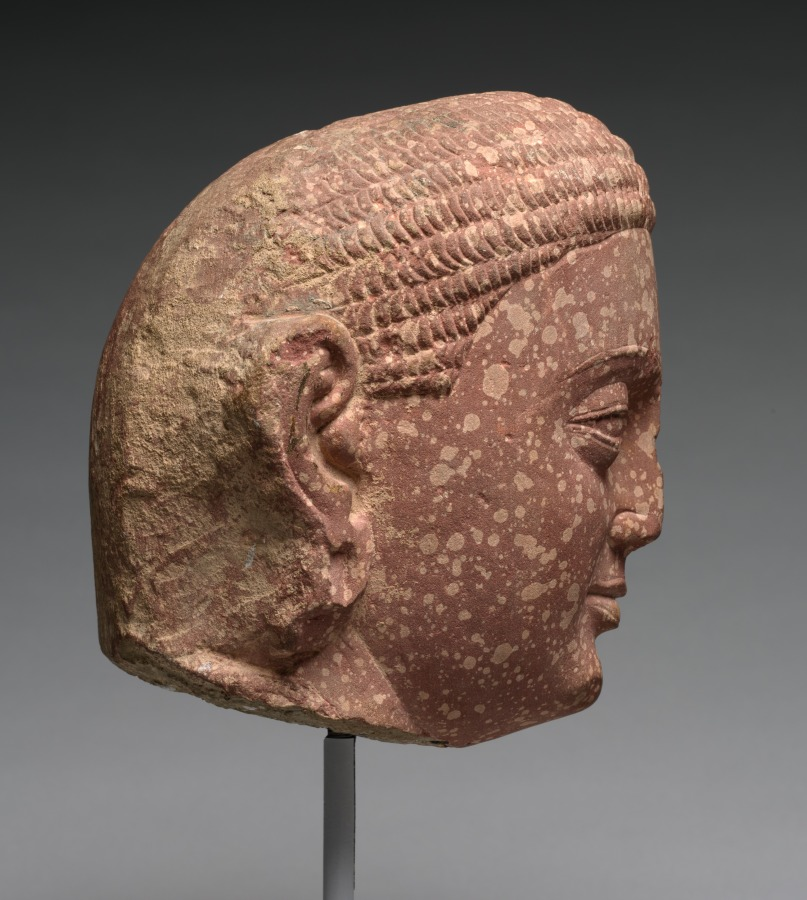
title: Head of Jina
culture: India, Mathura, Kushan period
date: c. 150–75 CE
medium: red mottled sandstone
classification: Sculpture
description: The short rows of hair show the new growth after this figure pulled out every lock by hand. Such a radical act demonstrated renunciation from a society that dictated the wearing of long hair to be covered by a turban. Since there is no protrusion at the top of the head, he can be recognized as a Jina, rather than a Buddha or other holy man. His slight smile and placid alert gaze communicate the power, bliss, and wisdom of one who has reached a state of pure knowing and liberation from delusions.